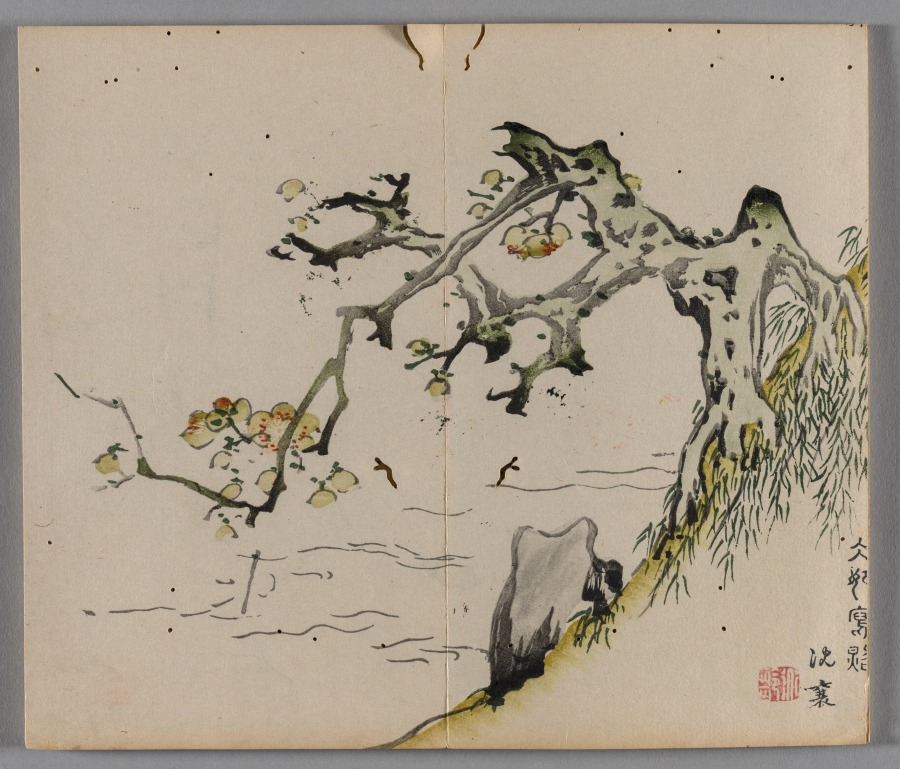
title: Ten Bamboo Studio Painting and Calligraphy Handbook (Shizhuzhai shuhua pu): Plum Blossoms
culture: China, Qing dynasty (1644-1911)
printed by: Hu Zhengyan (Chinese, c. 1584–1674)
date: 1633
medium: Woodblock-printed book; ink and colors on paper; first edition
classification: Print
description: Color printing reached a level of perfection in the early 1600s, as seen in this Ten Bamboo Studio Collection of Calligraphy and Painting and the Mustard Seed Garden Manual of Painting (printed 1679 and 1701). The painterly quality, precision in registering (aligning) the woodblocks, and harmonious colors made them the most successful color print editions in Chinese history. Both editions were printed and compiled in Nanjing, spread nationwide, and had a great impact on the arts in Japan and Korea.